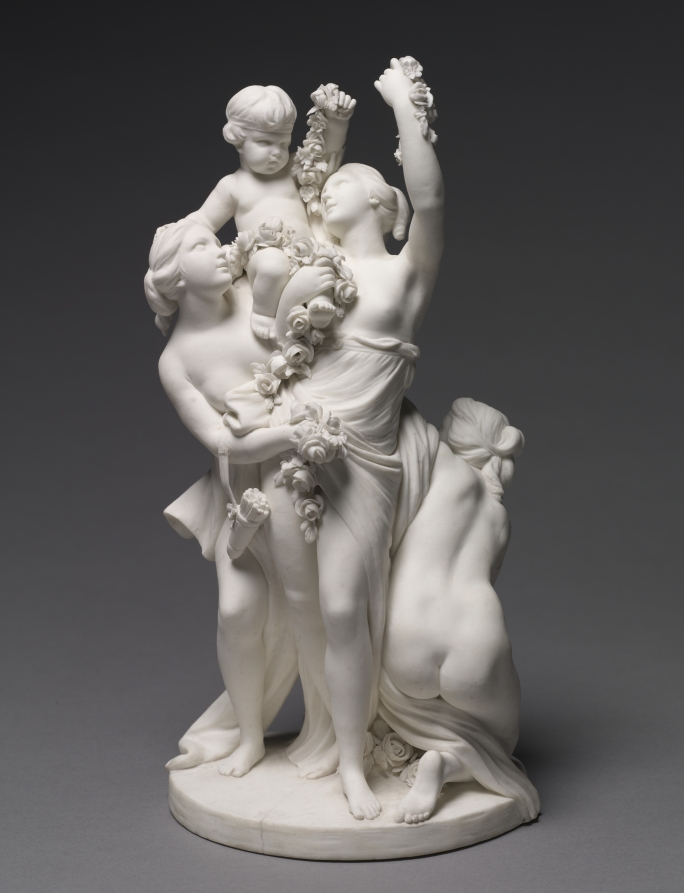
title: Figure Group of Love Carried by the Three Graces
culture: France, Sèvres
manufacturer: Sèvres Porcelain Factory (French, est. 1756)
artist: after a design by François Boucher (French, 1703–1770)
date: c. 1768–78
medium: unglazed soft-paste porcelain (biscuit)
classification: Ceramic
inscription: [Incised on top of base]: "B"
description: This figure group was likely modeled after the designs of François Boucher, whose designs appeared as figures or paintings on Sèvres porcelain. The scene represented is pulled from classical antiquity; the child wreathed in flowers is a physical manifestation of love and the women who hold him aloft are the three daughters of Zeus, Greek god of the sky.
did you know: The design of this figure group appeared among the 38 porcelain figure groups included in a service commissioned for Catherine of Russia in 1779.